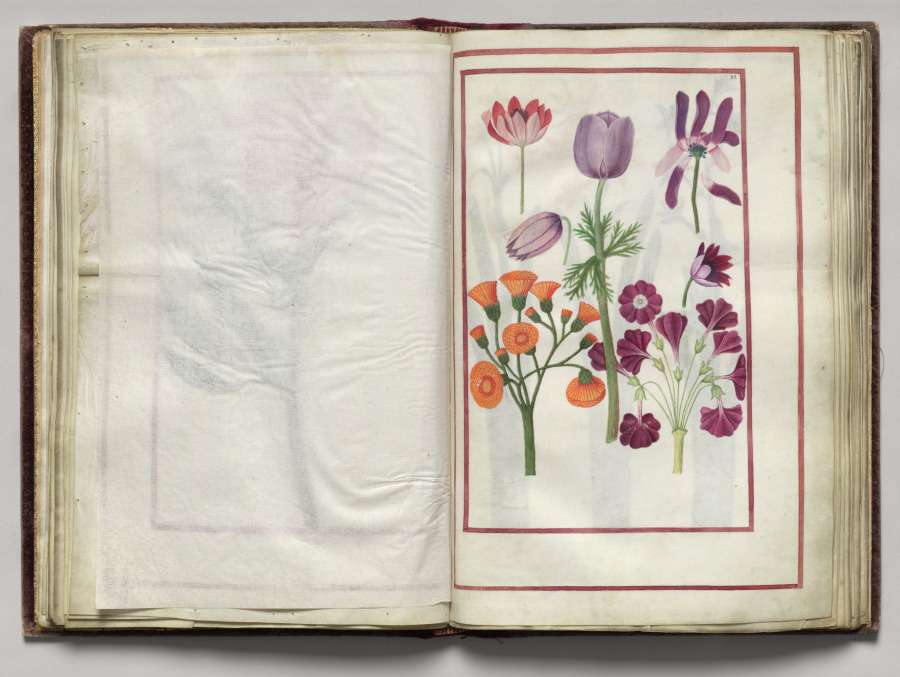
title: Anemones, folio 18 (recto), from Florilegium (A Book of Flower Studies)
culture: France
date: 1608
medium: watercolor, ink, silver, and gold over occasional traces of pencil, on vellum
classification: Bound Volume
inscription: Dated: Poitiers 1608 (on frontispiece) Signed: On frontispiece in black ink, lower right: Van Kuyk Notation on drawing: Frontispiece: in pencil, lower margin: * élève de Van Kessel, peintre flammand (* in pencil also appears in front of Van Kuyk's name).